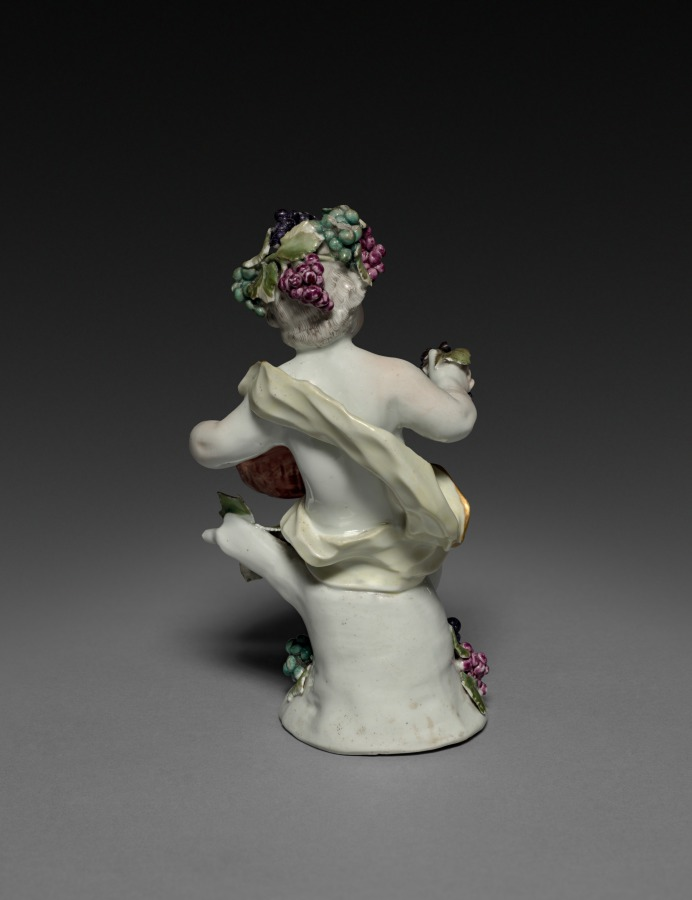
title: Autumn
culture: England, Derby, 18th century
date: c. 1760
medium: soft-paste porcelain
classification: Ceramic